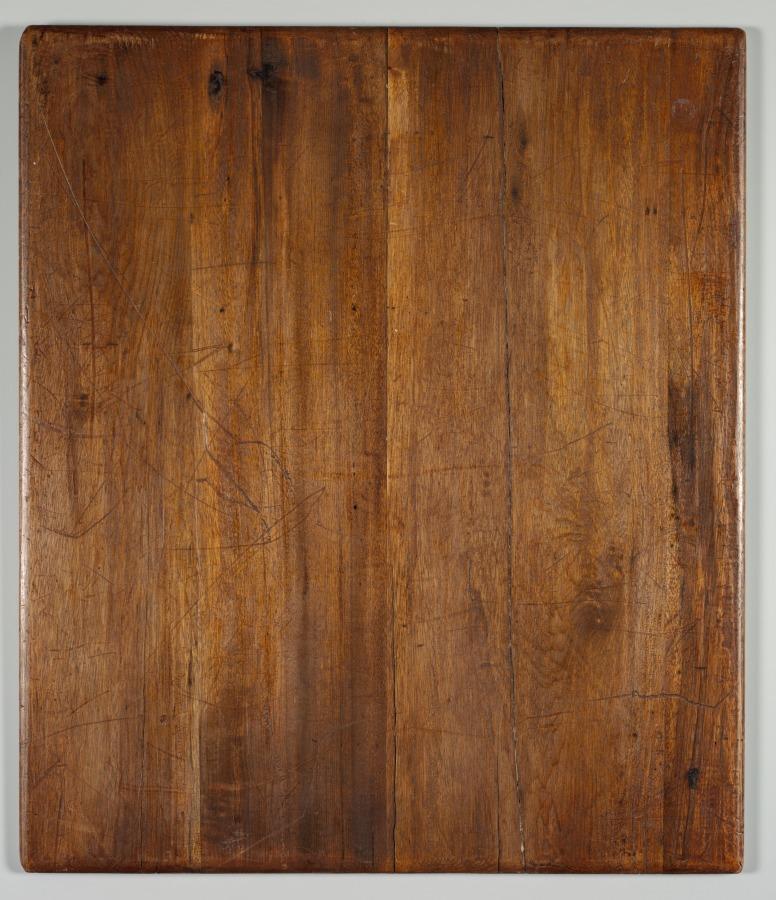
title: Battle Scenes of the Quelling of Rebellions in the Western Regions, with Imperial Poems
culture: China, Qing dynasty (1644–1911), Qianlong reign (1736–95)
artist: Giuseppe Castiglione (Italian, 1688–1766)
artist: Jean Damascene Sallusti (Italian, d. 1781)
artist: Jean Denis Attiret (French, 1702–1768)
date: c. 1765–74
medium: Etchings, mounted in album form, 16 leaves plus two additional leaves of inscriptions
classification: Print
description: This set of etchings was commissioned by Emperor Qianlong to record in pictorial terms the courage of his generals and soldiers in quelling the rebellions in the Western Regions. Qianlong added his own poem to each of the etchings, indicating his appreciation and pride in this demonstration of military might. "Western Regions" refers to the present-day Xingjiang province, often described in Western writing as "Central Asia."